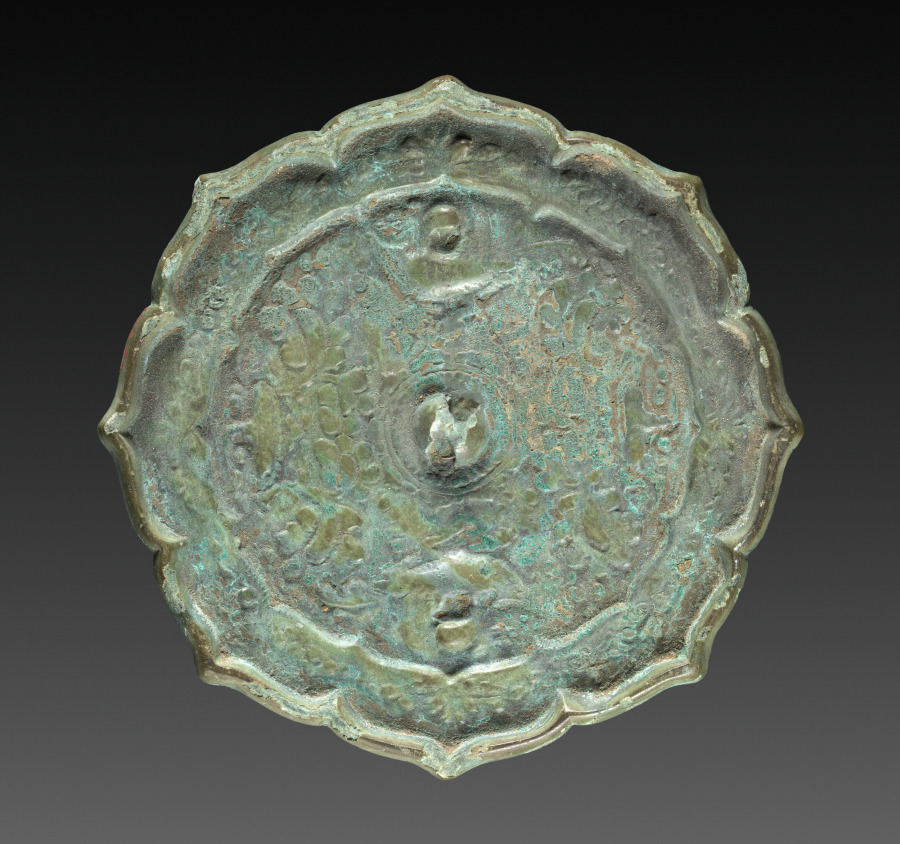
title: Mirror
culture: Japan, Heian period (794–1185)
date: 794–1185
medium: bronze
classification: Metalwork